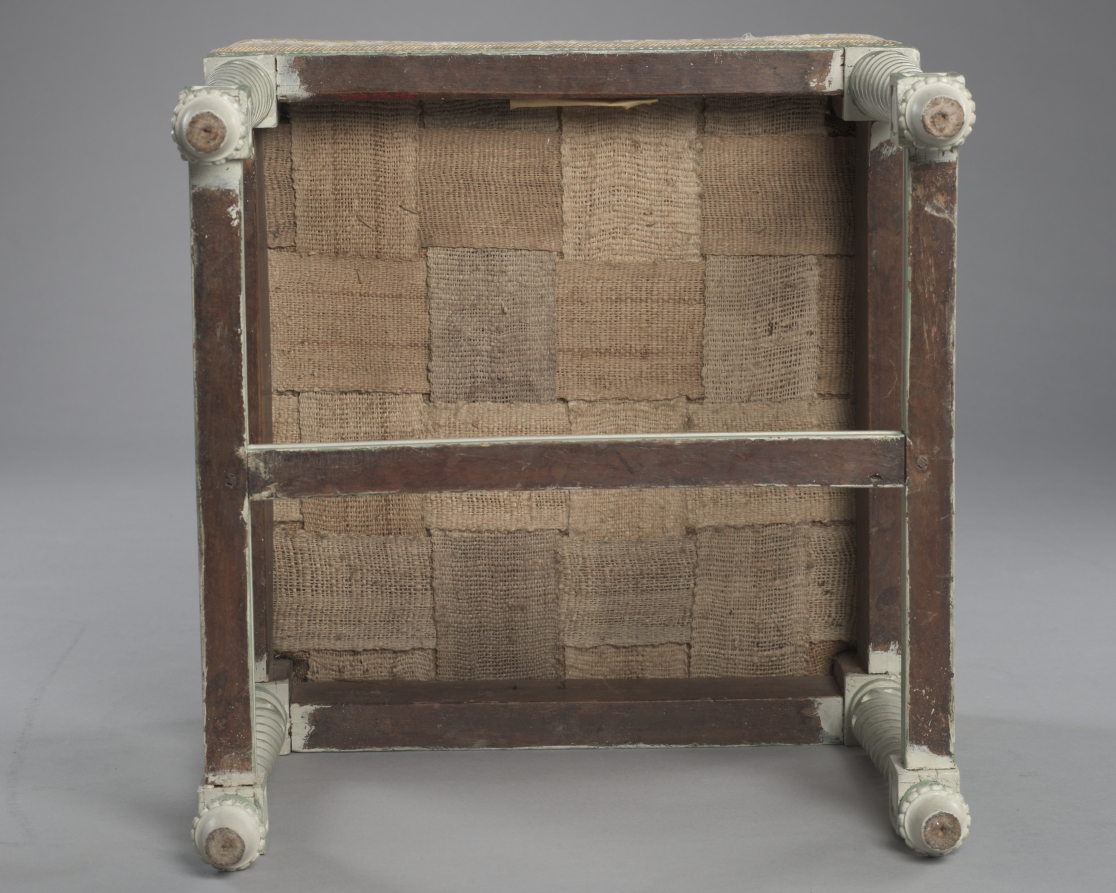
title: Stool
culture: France, Paris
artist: François-Honoré-Georges Jacob (French, 1770–1841)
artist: Georges Jacob (French, 1739–1814)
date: 1805–1813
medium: painted walnut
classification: Furniture and woodwork